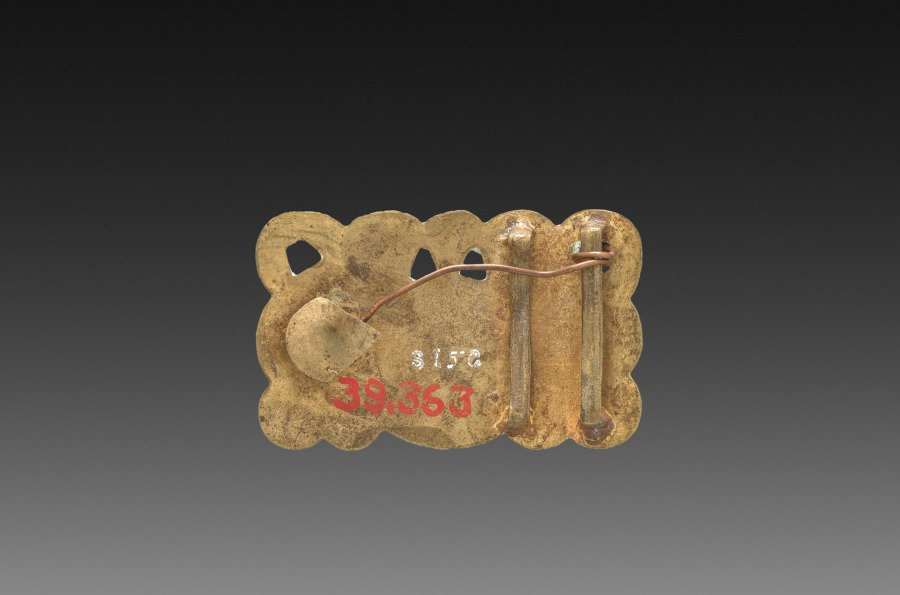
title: Belt Buckle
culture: Japan, Meiji period (1868–1912) or Taishō period (1912–26)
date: early 1900s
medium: cloisonne enamel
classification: Enamel